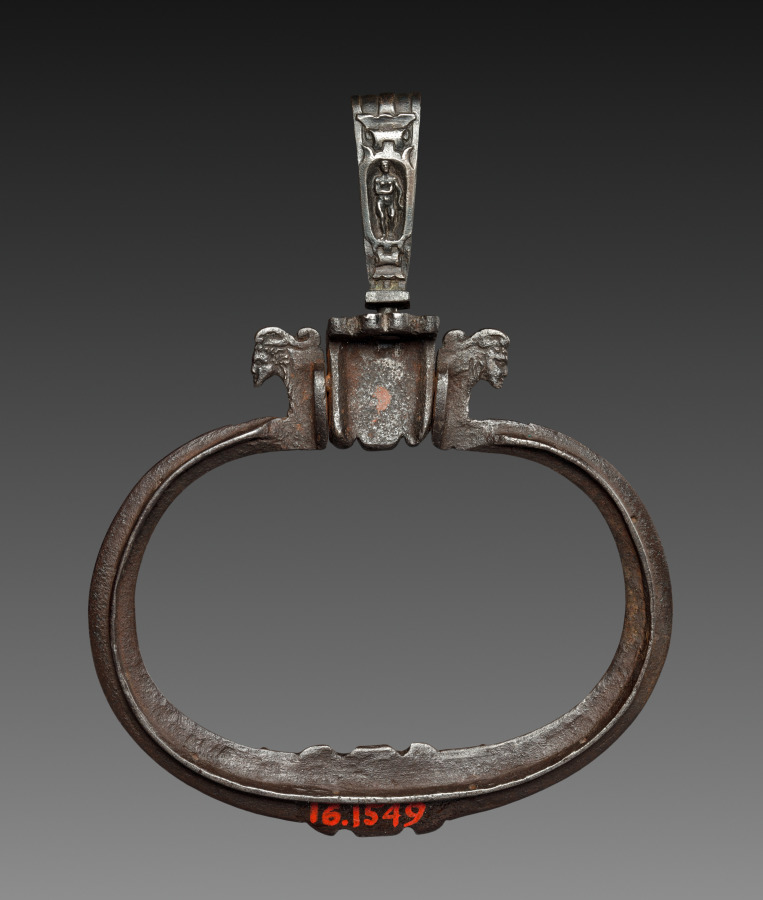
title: Purse Strap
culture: Italy, 16th century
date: 1500s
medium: chiseled steel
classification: Metalwork